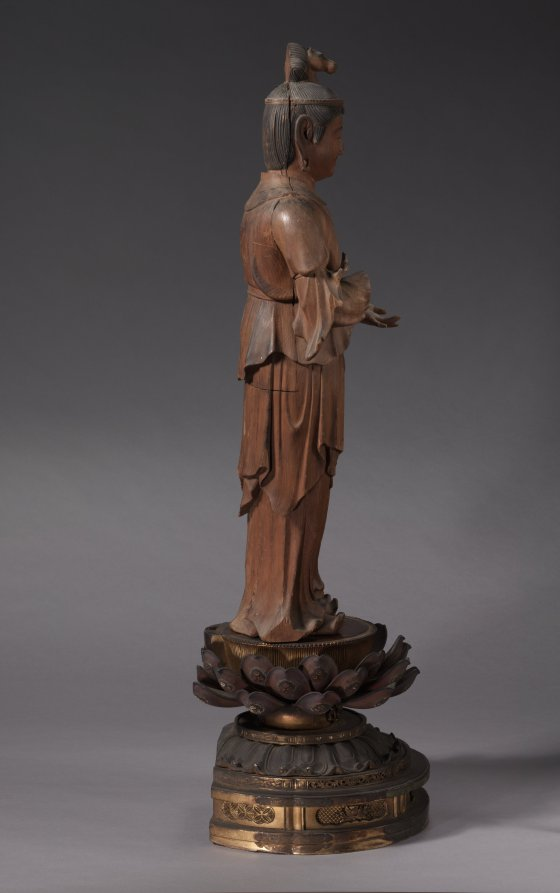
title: Batō (Horse-Headed) Kannon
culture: Japan, Kamakura period (1185–1333)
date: early 1300s, pedestal 1600s–1700s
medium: Wood with traces of color and gold; pedestal: wood with lacquer, color, and gold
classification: Sculpture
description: Batō Kannon, or Hayagriva Avalokiteshvara in Sanskrit, is the “horse-headed” form of the bodhisattva of compassion, who presides over the realm of animals in the Buddhist Six Realms of Transmigration (rebirth). A horse’s head appears in the hair of this sculpture to identify it. Bodhisattvas are beings who, though enlightened, choose to remain within the worlds of existence to help others. The six realms are heaven, hell, human, animal, hungry ghost, and ashura, or fierce supernatural entities.